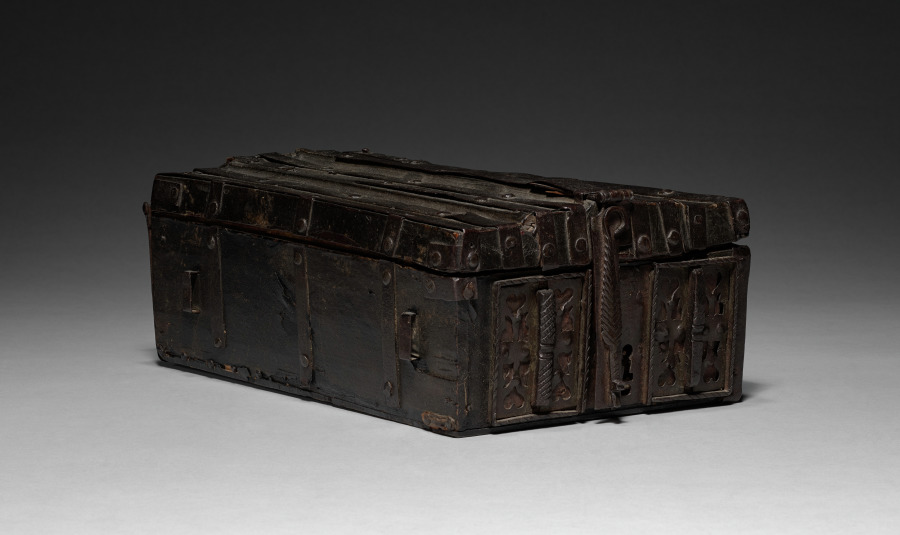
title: Coffret with Woodcut of Saint Veronica's Vernicle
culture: Coffret: France, probably Paris; Woodcut: Germany, Augsburg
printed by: Hans Burgkmair the Elder (German, 1473–1531)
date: Coffret: c. 1515; Woodcut: c. 1509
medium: Wood, leather, iron, textile, woodcut with stenciled coloring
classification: Print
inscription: SALVE. XPI. EFFIGIES. SACERRI[M]A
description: This remarkable object is thought to have functioned as a traveling case to keep small valuables and books, as well as a provisional altar. Made in France around 1515, the interior lid is affixed with a devotional woodcut made in Germany, imported, and colored for the purpose. Featuring an image of the veil of Saint Veronica, the text at the bottom of the woodcut guides the user in prayer to the holy image of Christ’s face which has been miraculously imprinted on the veil, an action that held promise of indulgences (a reduction in one’s punishment for sins). Presumably, the owner carried the box on a journey, retrieved a prayer book from inside, and propped it open in order to practice daily prayers.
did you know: A secret compartment on the top lid of this coffer may have held a relic, consecrated host, or valuable document.